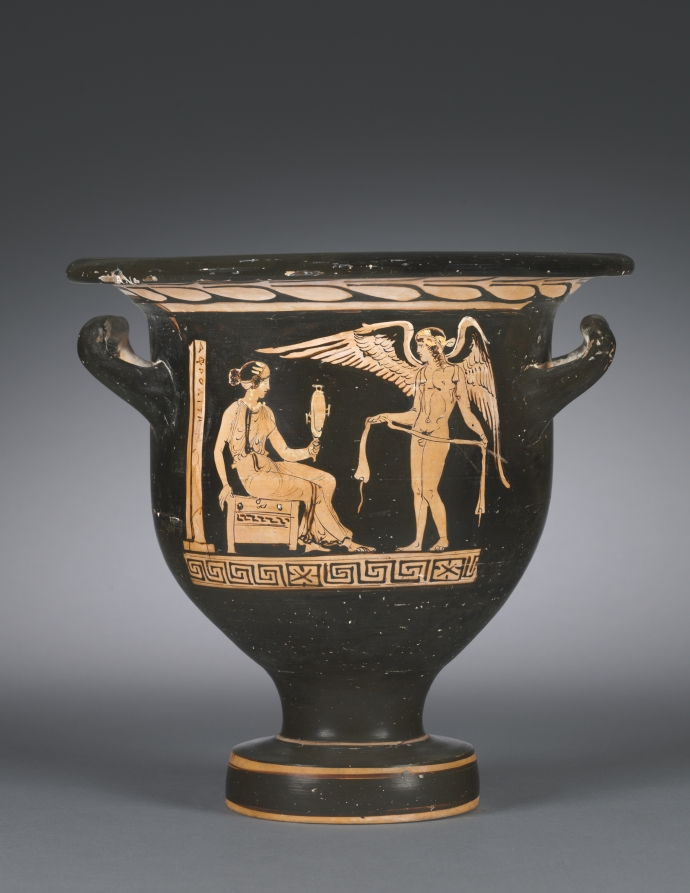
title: Red-Figure Bell Krater (Mixing Vessel): Aphrodite and Eros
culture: South Italian, Apulian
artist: attributed to Graz Painter (South Italian, Apulian, active c. 380–360 BCE)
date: c. 370–360 BCE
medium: ceramic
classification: Ceramic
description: This small mixing vessel shows a finely dressed woman seated on a chest and holding up a mirror to admire herself. Before her stands Eros, the winged god of love, holding a ribbon or sash. Behind the woman stands a pillar with the inscription ΑΦΡΟΔΙΤΗ, or APHRODITE, the goddess of love. Such labels are rare on vases, and scholars debate whether this names the woman shown as Aphrodite herself, with her son Eros, or a bride envisioning herself as Aphrodite, just before her wedding.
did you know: The dancing nude youths on the reverse are unusual; typically they would be standing and draped.